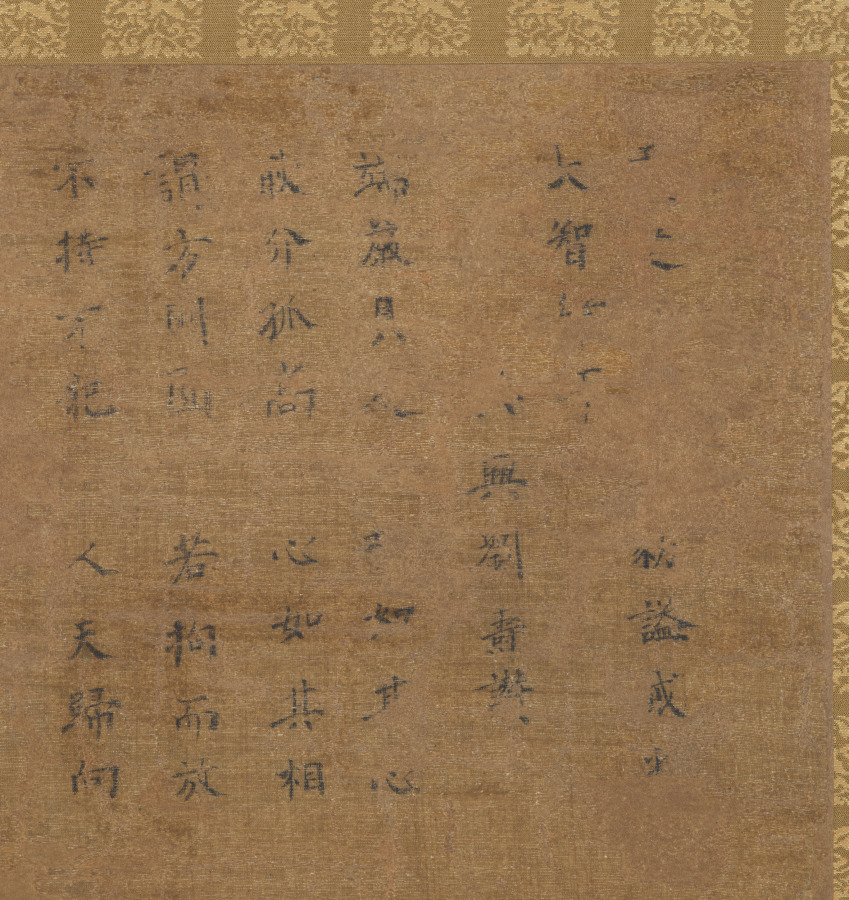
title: Portrait of Priest Dazhi (1048–1116), Master of Law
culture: China, Southern Song dynasty (1127-1279)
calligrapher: Liu Tao (Chinese, late 1000s–early 1100s)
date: 1100s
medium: Hanging scroll; ink and light color on silk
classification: Painting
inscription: Inscription by Liu Tao (late 1000s–early 1100s): Dignified with the perfection of the upasampada,/ His appearance is like his mind;/ Uncompromising and loftily aloof,/ His mind is like his appearance./ To say he is square, he proves to be round;/ He looks timid, yet his spirit is unbound./ Having no attachment, and holding no reins,/ Man and deities alike take refuge in him. (Translation by WKH, 1980)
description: Monk Yuanzhao, with the honorific title Dazhi Lüshi, Great Wisdom Master of Vinaya, is depicted here as an itinerant monk, holding his alms bowl in the left and staff in the right. In 1142, Emperor Gaozong had bestowed Yuanzhao with a posthumous title, mentioned in the inscription, which suggests that the portrait was made after the master’s death. A master of the Lü sect of Buddhism, with a calm benevolent smile on his face, Yuanzhao was active on Mount Tiantai and in Hangzhou. Later, Liu Tao, a southerner from Changxing, added the inscription. The eulogy reads: Dignified he is, perfect in his upasampada [ordination of a monk]. His appearance is like his mind. Uncompromising and aloof. His mind is like his appearance. To say he is square, he proves to be round. He looks timid, yet his spirit is unbound. Having no attachment, and holding no reins, men and deities alike take refuge in him. —translated by Wai-Kam Ho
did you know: A native of Hangzhou, the priest Dazhi was known for his eloquent exposition of Buddhist doctrines and for his success in winning many converts.